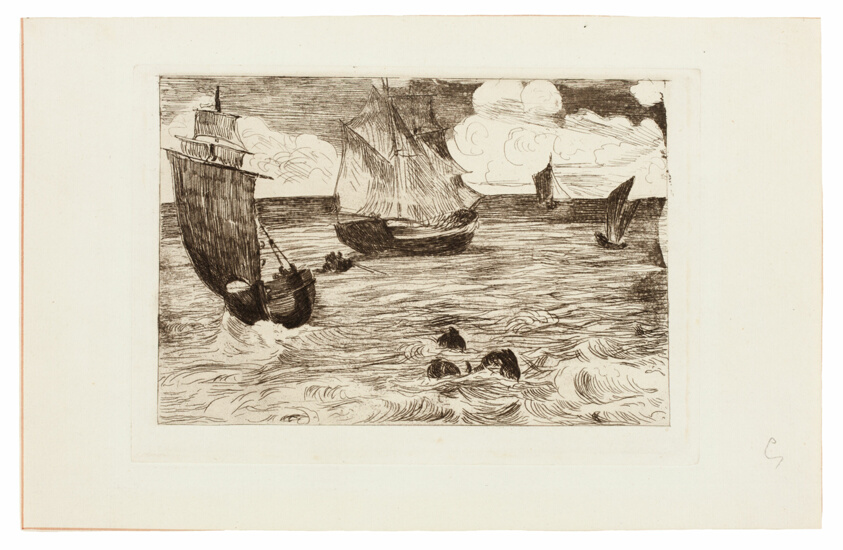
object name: Print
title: Marine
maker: Édouard Manet (French, 1832-1883)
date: 1865–66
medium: Etching, aquatint and roulette in brown on ivory laid paper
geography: France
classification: etching; print; prints and drawing